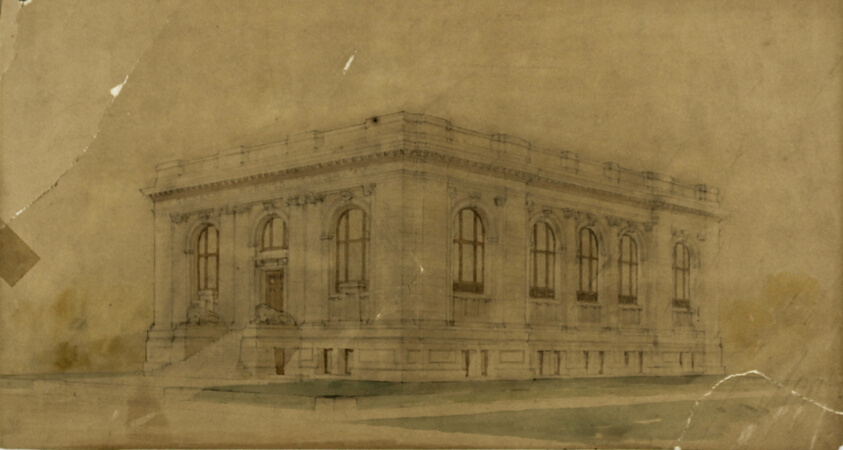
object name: Architectural Drawing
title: Colorado Springs Public Springs, Colorado, Perspective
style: 20th Century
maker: Peter Joseph Weber (American, born Germany 1863–1923)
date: c. 1903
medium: Pencil and watercolor on toned paper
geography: United States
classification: architectural drawing; architecture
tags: libraries, architecture